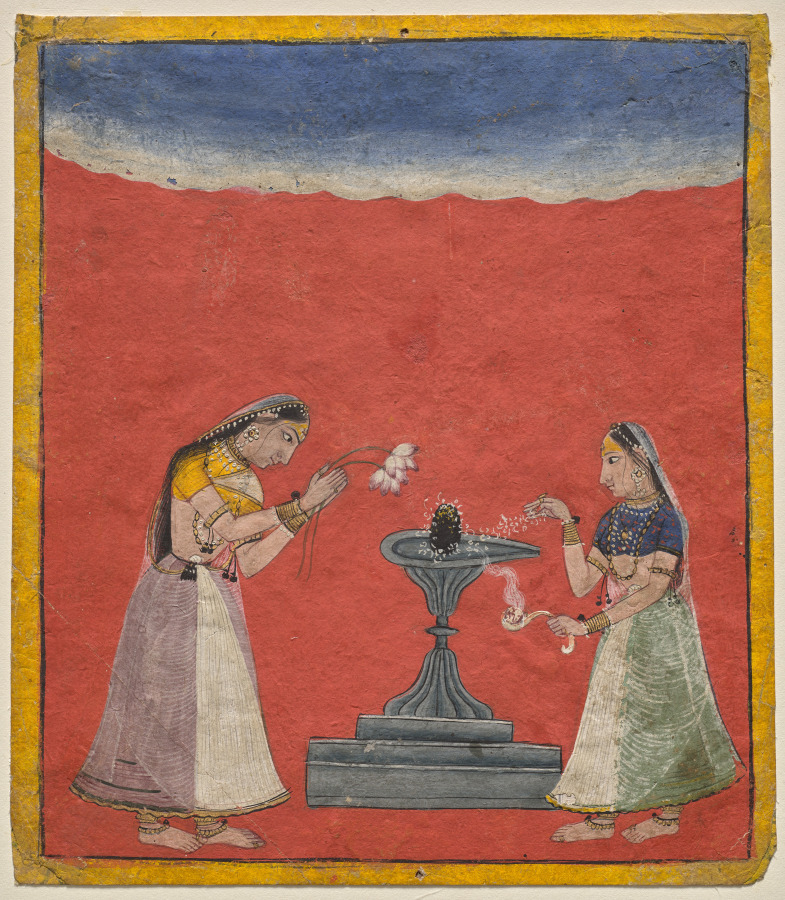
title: Women worshiping a Shiva linga: Devagandhari Ragini of Hindol Raga, from a Ragamala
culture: Northern India, Pahari kingdoms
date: c. 1700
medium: gum tempera and gold on paper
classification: Painting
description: Removed from any temple setting, the focus of the scene is on the intensity of the women’s devotions to the Hindu god Shiva in his abstract form of a linga. The figure on the right tosses flower petals on the linga and offers incense in a handheld censer. Her taller companion wearing a yellow blouse holds two lotus flowers in her hands cupped in devotion as she bows reverently.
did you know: The iconography of Devagandhari is consistent in several Ragamala series from Chamba